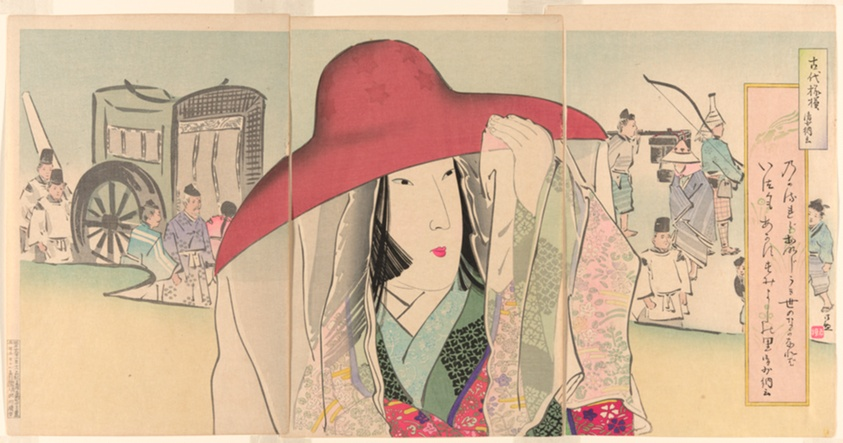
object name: Print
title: Sei Shonagon, from the series Ancient Patterns (Kodai moyo)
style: Japanese (culture or style)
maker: Kobayashi Kiyochika (Japanese, 1847-1915)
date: Meiji period (1896–1912), 1896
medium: Color woodblock print, oban triptych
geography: Japan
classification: woodblock print; print; asian art